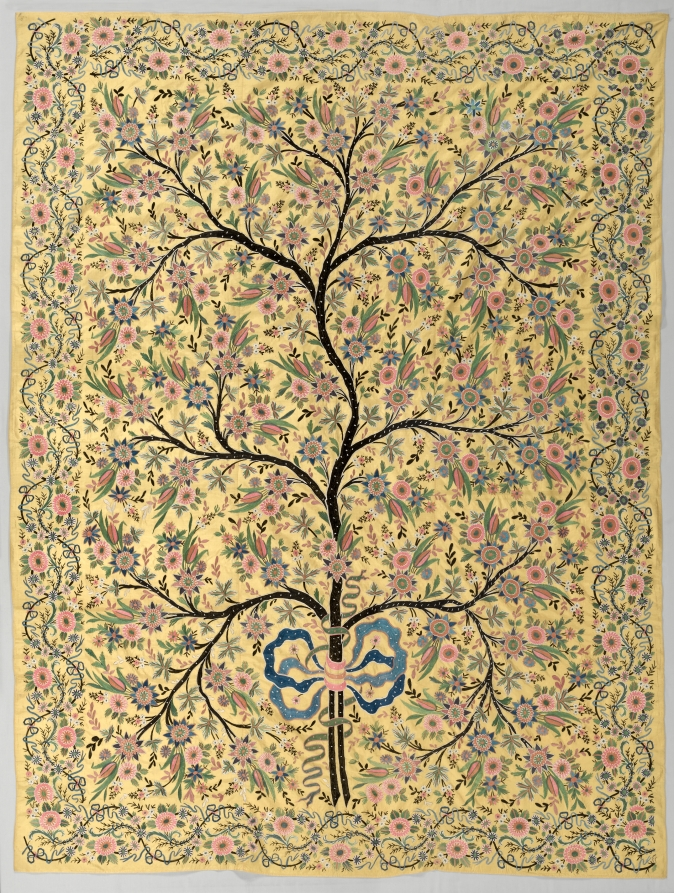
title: Silk hanging with embroidered tree of life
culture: Turkey, Ottoman period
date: 1800s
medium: Silk: plain weave; embroidery, chain stitch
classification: Embroidery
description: This resplendent tree of life embroidery integrates Turkish traditions with new European styles that became increasingly fashionable during the mid-18th century. The fanciful tree projects lavish bouquets of Turkish flowers while the tree trunk is wrapped with an elaborate European-style bow, as are the meandering vines in the floral border. A professional draftsman drew the pattern with ink on the radiant yellow silk taffeta embroidered with at least 12 vibrant colors in chain stitch. It was most likely made in a professional workshop as a hanging for special occasions, a conspicuous symbol of beauty and wealth.